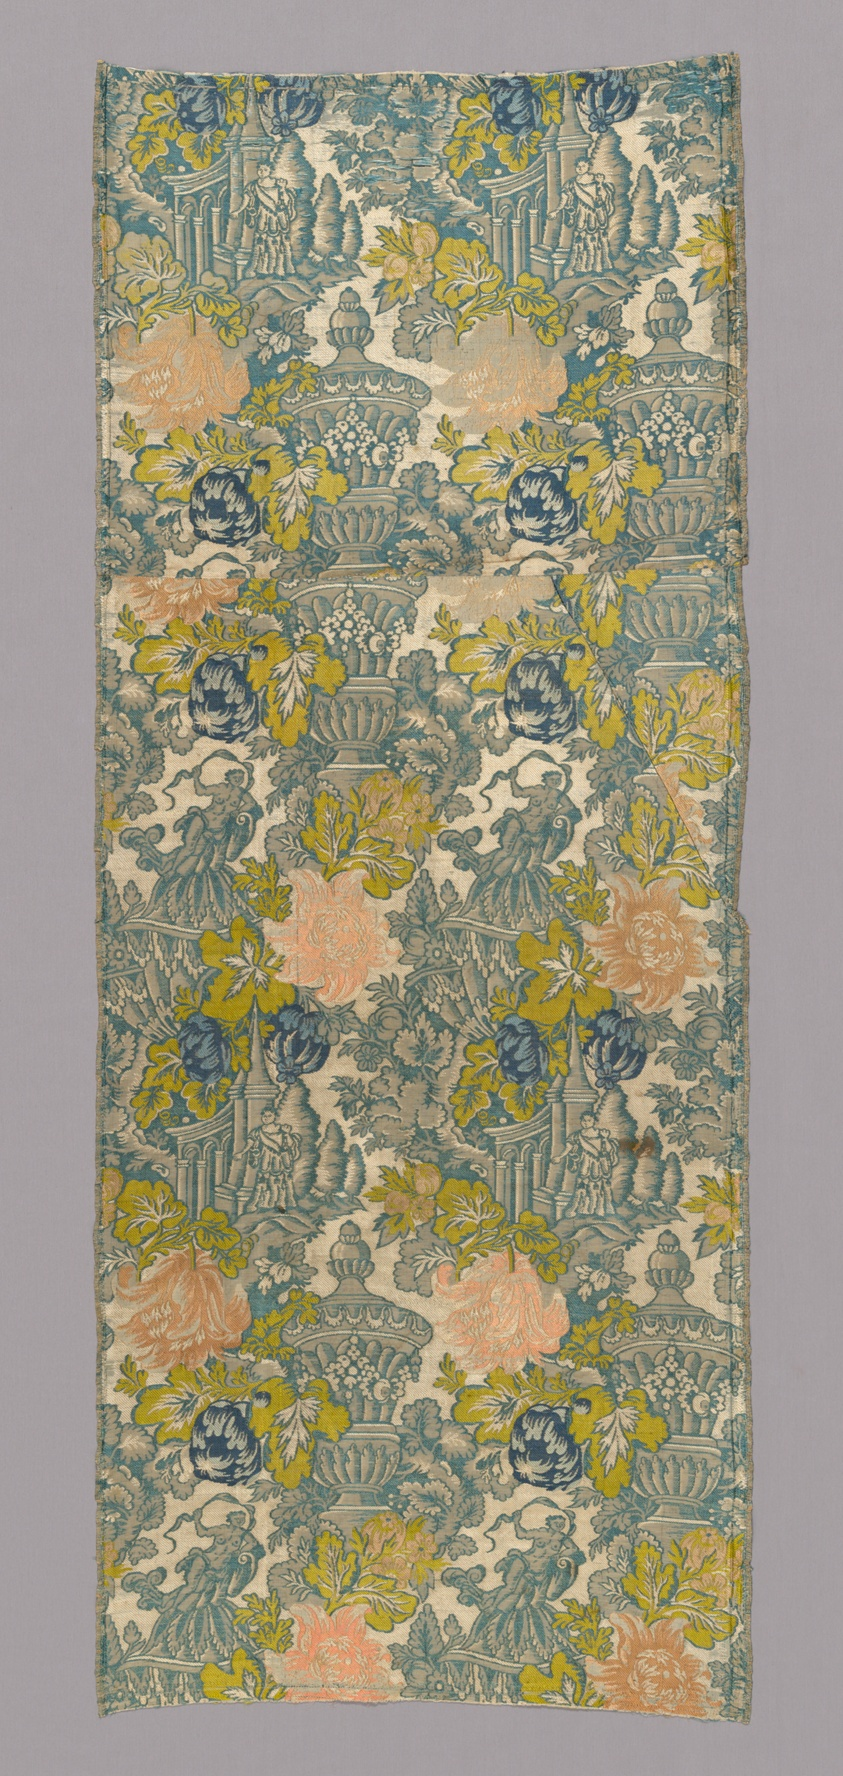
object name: Textile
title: Panel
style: Baroque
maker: France or Italy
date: 1701/50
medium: Silk, plain weave with supplementary brocading wefts and self-patterning two-color complementary ground wefts tied by main warp in weft-float faced twill interlacings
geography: France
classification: textile; weaving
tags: Floating Gardens